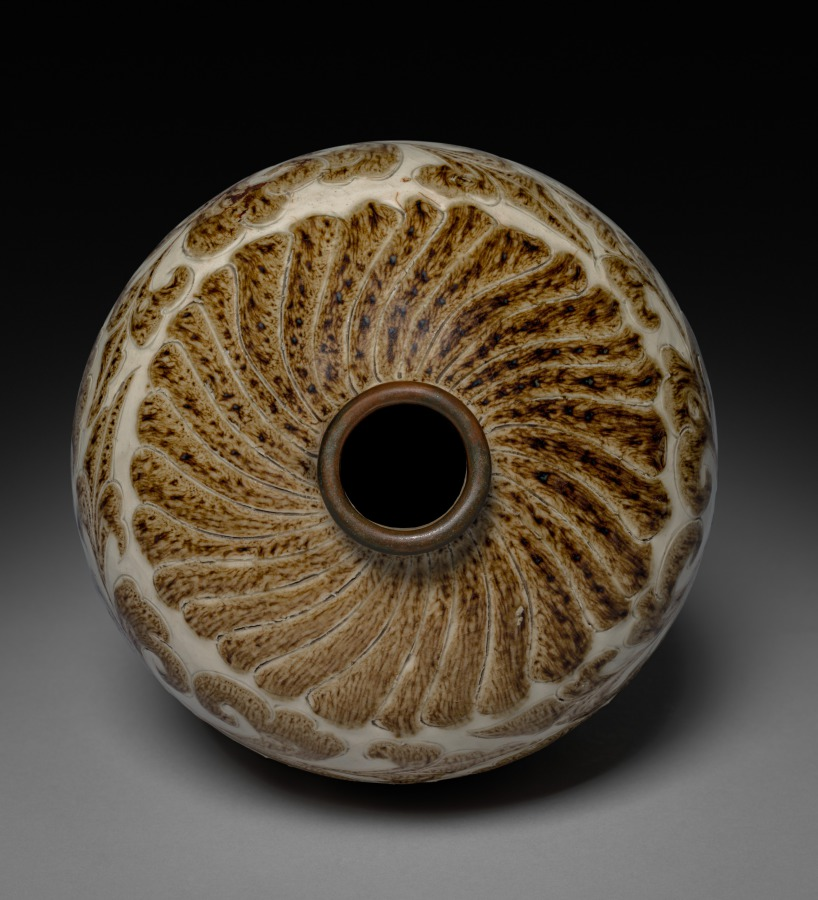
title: Meiping Vase: Cizhou Ware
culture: China, Northern Song dynasty (960-1127)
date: 1100s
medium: Buff stoneware with carved underglaze slip decoration, Cizhou ware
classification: Ceramic